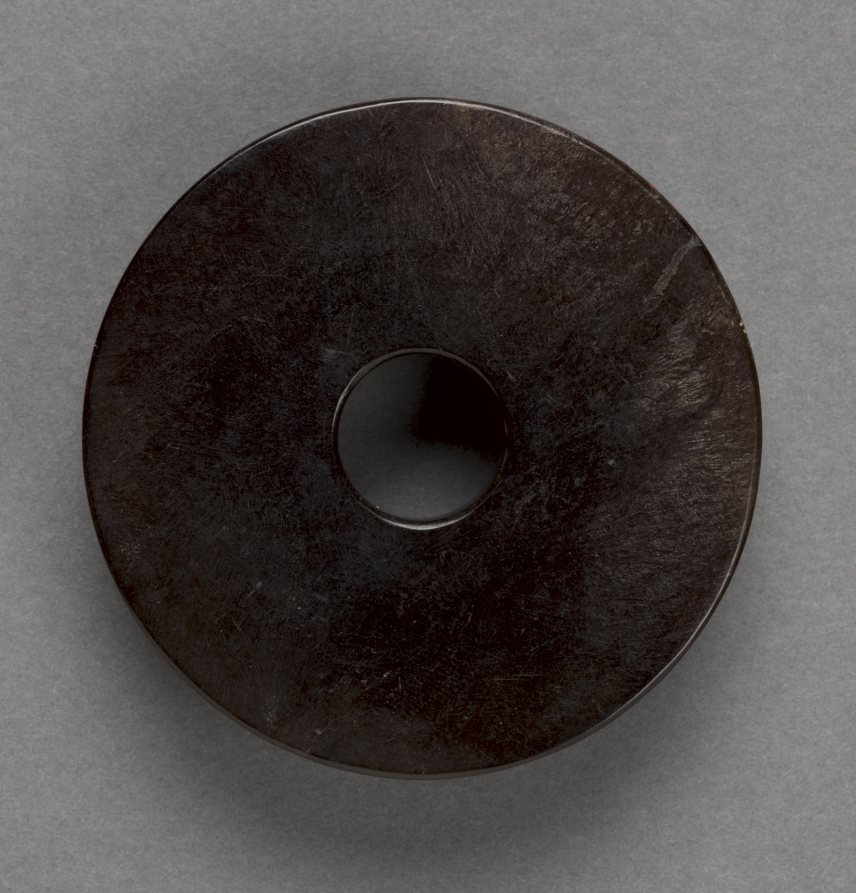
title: Pi (Ornament)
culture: China, Han dynasty (202 BCE–220 CE) or earlier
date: 206 BCE–220 CE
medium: jade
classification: Jade